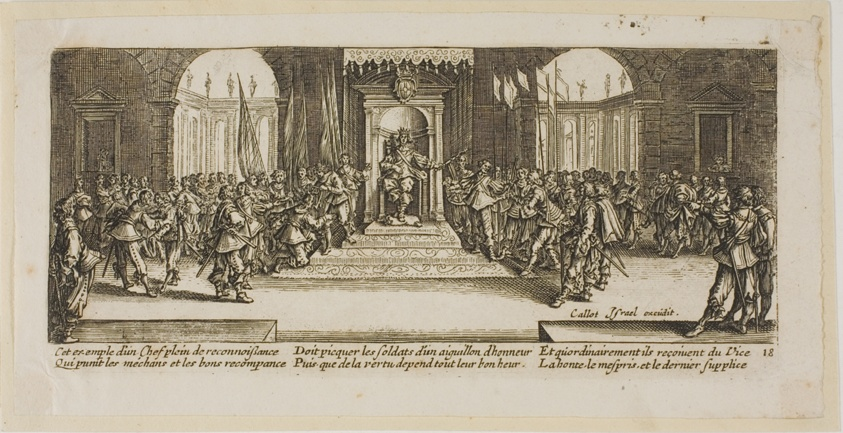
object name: Print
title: Distribution of Rewards, plate eighteen from The Large Miseries of War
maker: Gerrit Lucasz van Schagen (Dutch, born 1642); after Jacques Callot (French, 1592-1635)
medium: Etching on paper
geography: Netherlands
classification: etching; print; prints and drawing